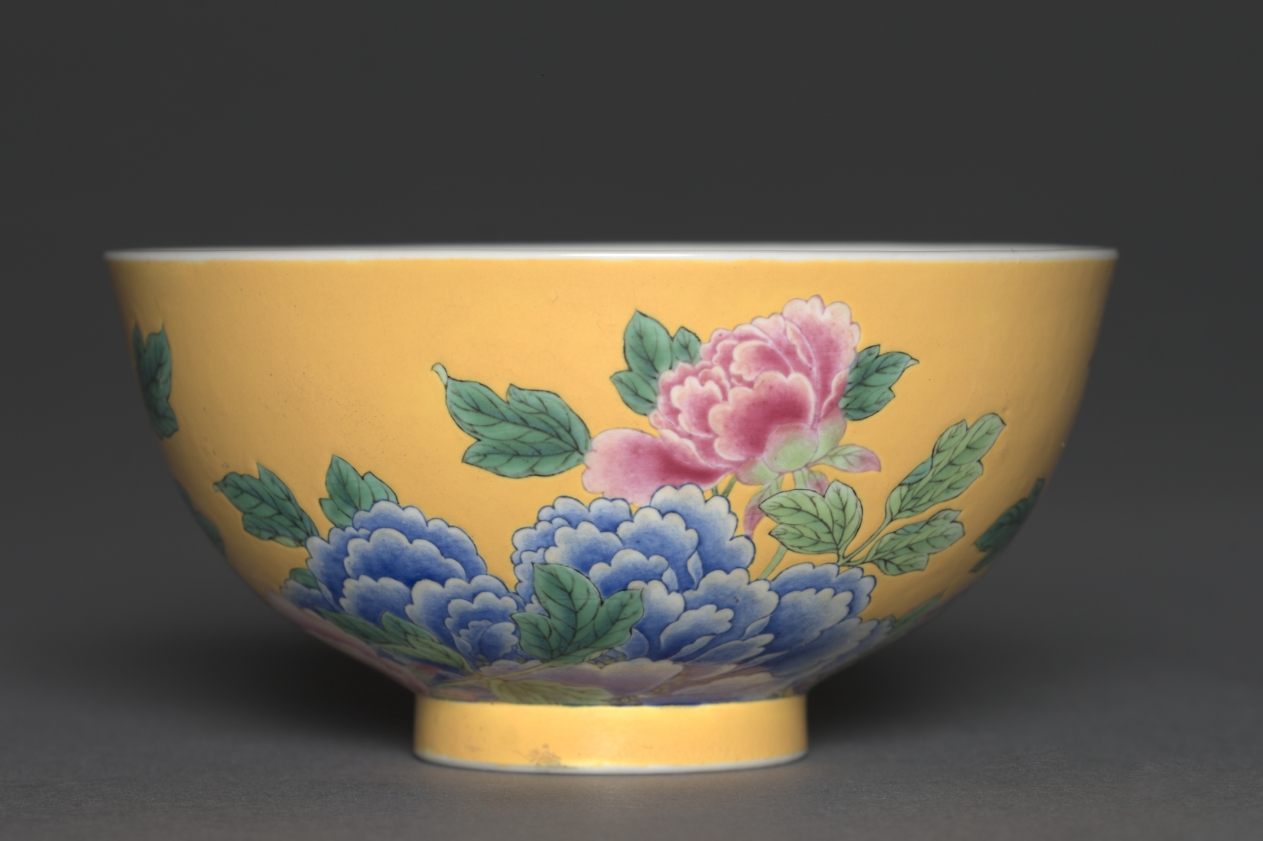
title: Bowl with Peonies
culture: China, Jiangxi province, Jingdezhen kilns, Qing dynasty (1644-1911), Kangxi mark and reign (1661-1722)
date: 1662–1722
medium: porcelain with foreign color (yangcai) overglaze enamel decoration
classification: Ceramic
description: This bowl was made at the Jingdezhen kilns and then decorated probably in the Imperial Palace workshops in Beijing.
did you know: In East Asian art, peonies traditionally symbolize prosperity and wealth.